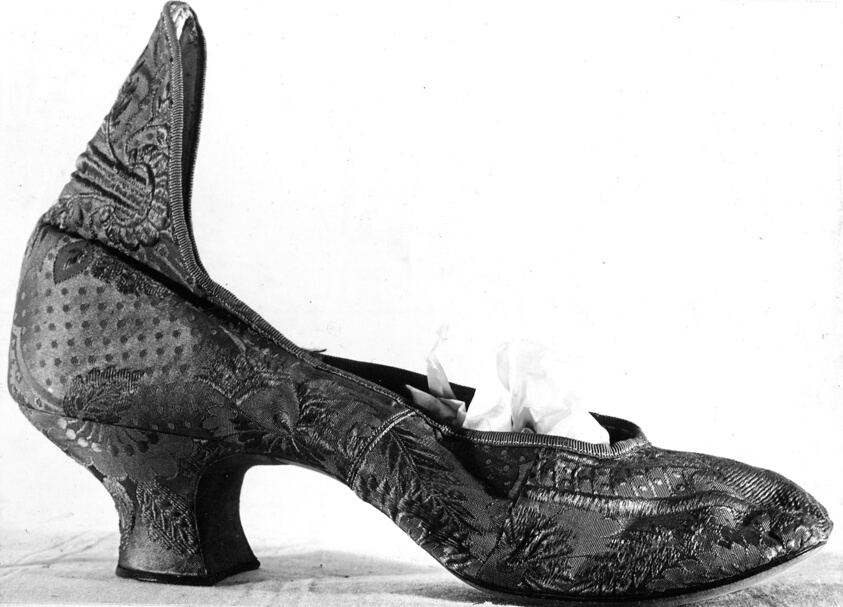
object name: Textile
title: Shoe (Single)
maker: France or Austria, Vienna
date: 1880s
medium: Brocaded; in rose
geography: France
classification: textile; shoes - weaving; costume accessory - shoe; costume; dress (garment); clothing